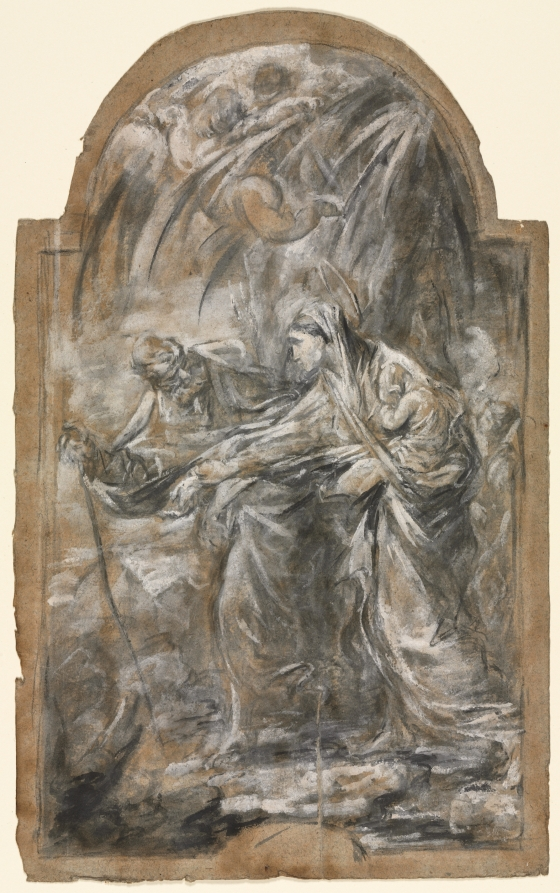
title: Flight into Egypt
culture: Italy, 18th century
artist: Alessandro Magnasco (Italian, 1667–1749)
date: 1740s?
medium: black, white and gray gouache; framing lines in black chalk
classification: Drawing